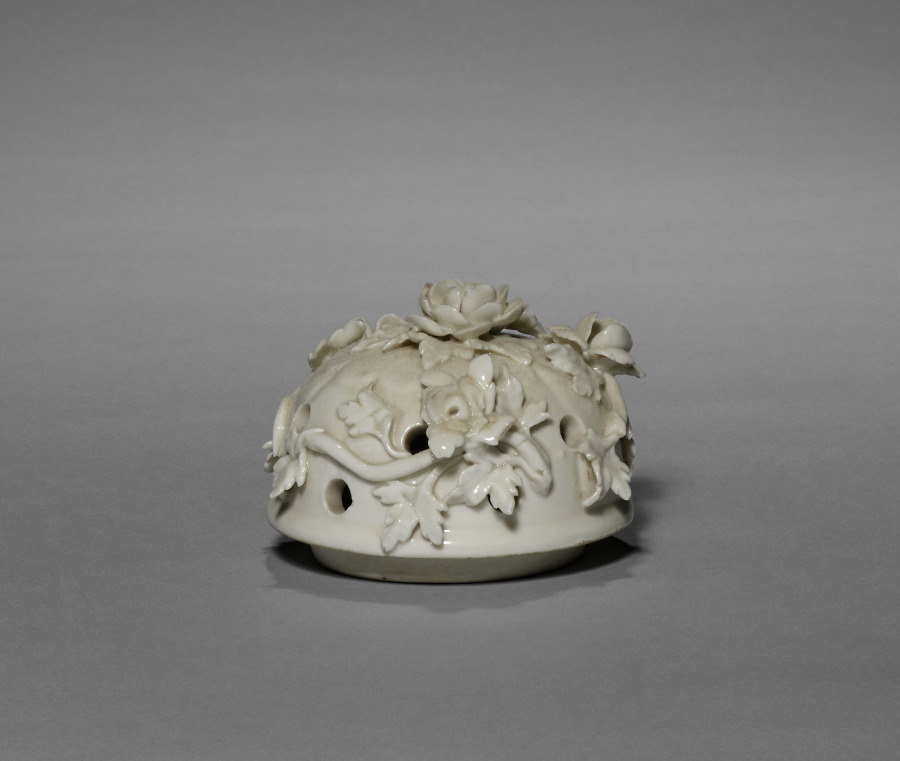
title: Cover for a Potpourri Vase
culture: France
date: 1860–1880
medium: blanc-de-chine porcelain; gilt bronze mount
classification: Ceramic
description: This cover is part of a pair of covered vases that were created to contain potpourri, a mixture of flowers, herbs, and spices emitting ambient fragrance. This specific function offered a particularly fertile ground for the development of French porcelain from the mid-1700s, as manufactories experimented with forms, surface ornamentations, and placement of perforations. Produced by the firm of Edmé Samson in the 1800s, the vases pay homage to this history. While using updated technique and material, as well as more exuberant decorations, these vases draw upon designs by earlier innovators such as the Saint-Cloud manufactory.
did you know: Potpourri vases always have holes in the top to let the scent of dried spices and flowers contained within freshen the air around them.